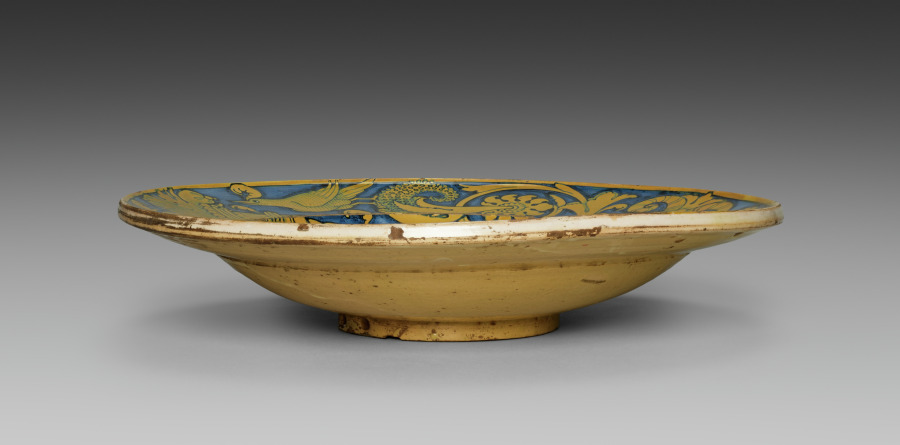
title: Plate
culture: Italy, Deruta, 16th century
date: c. 1520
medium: tin-glazed earthenware (maiolica)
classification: Ceramic